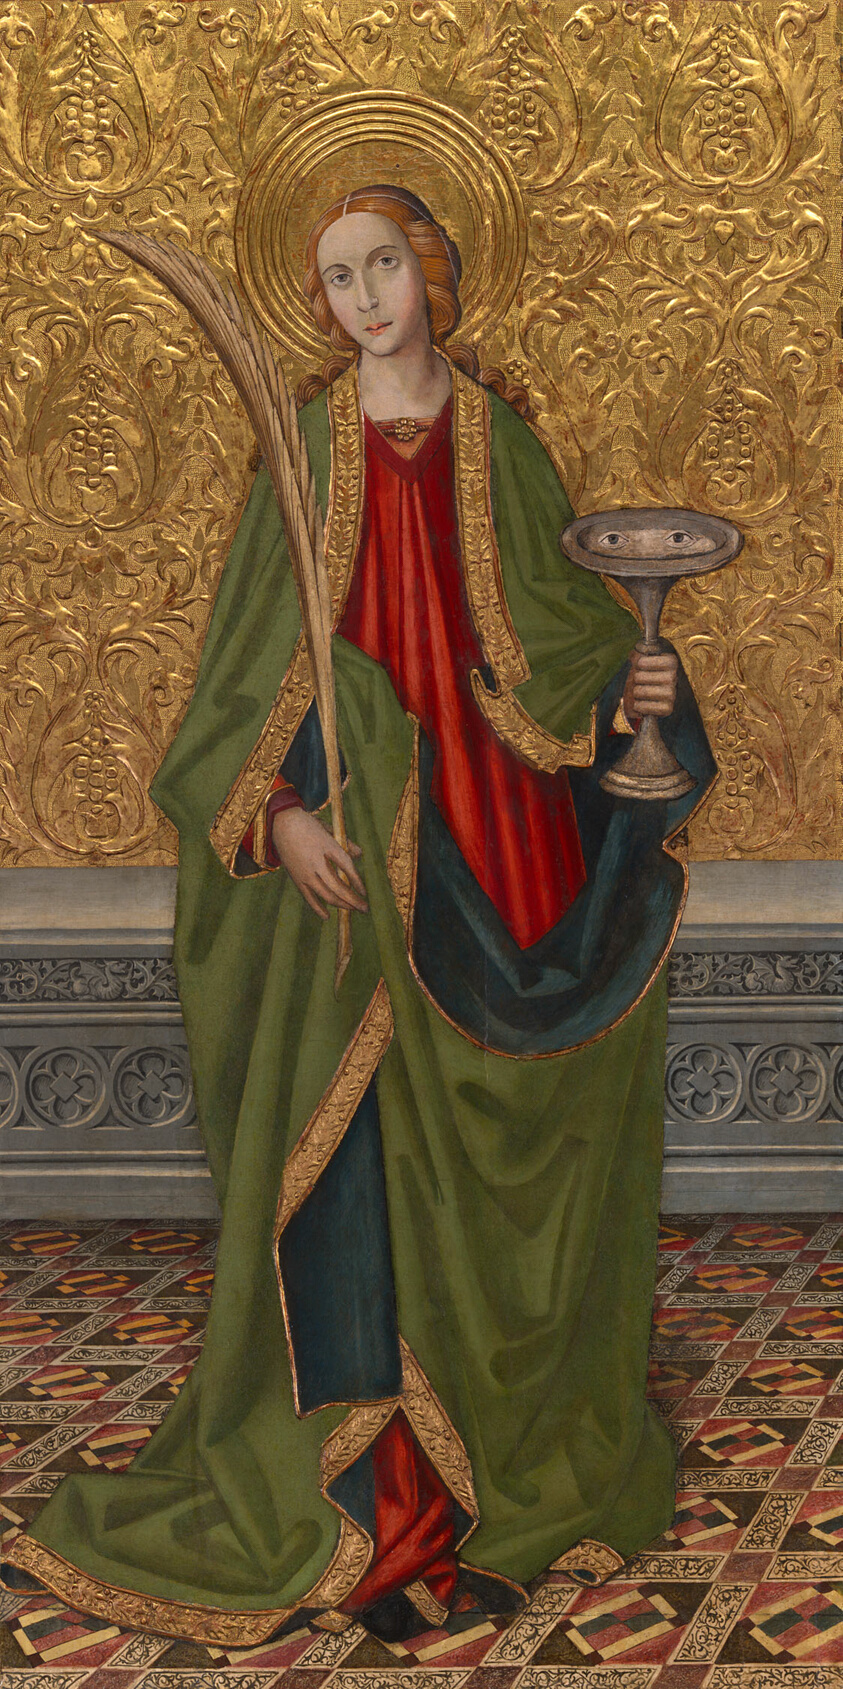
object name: Painting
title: Saint Lucy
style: 15th century, sixteenth century, Renaissance, 16th Century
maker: Vergós Workshop (Spanish, documented 1439–1503)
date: c. 1500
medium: Oil and gold on panel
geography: Spain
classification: painting; spanish; paint; oil on panel; gold; european painting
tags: saints, woman, martyrs, gold (color), eyes, plates, palm, interior, Tile, red (color), green (color), blue, blue (color), religion, religious figures, religious, Christian subjects, Christianity